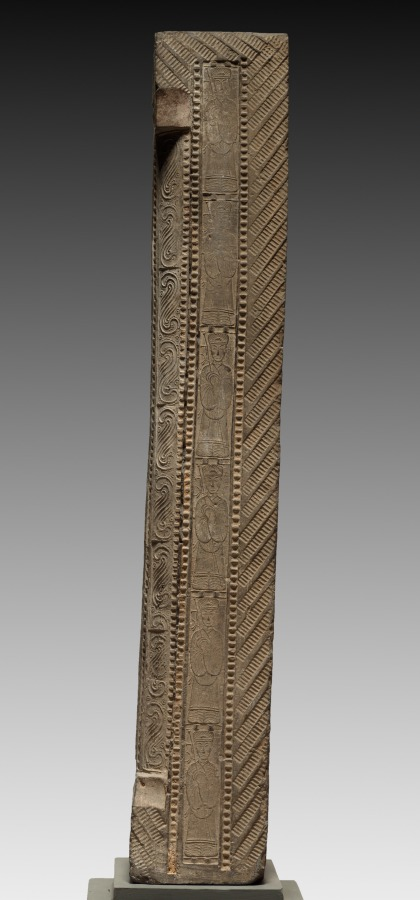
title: Hollow Tile: Column from Tomb-Chamber Doorway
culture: China, Han dynasty (202 BCE–220 CE)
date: 100–200 CE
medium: earthenware, die-stamped relief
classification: Ceramic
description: Striding tigers (top), racing horsemen (right column), and reverent officials (left column) are stamped into the surface of this underground portal to a tomb. The doorway preserves in stone the post-and-lintel structure, a basic element of Chinese wooden architecture. By the first century AD, a revolution in Chinese tomb construction and furnishing had taken place. Tombs lined with decorated bricks and tiles replace the earlier tombs constructed with only rammed earth-walls. Ceramic surrogates or models of stoves, houses, servants, and pets filled these more durable chambers, symbolically extending the creature comforts of this world into the world after death.